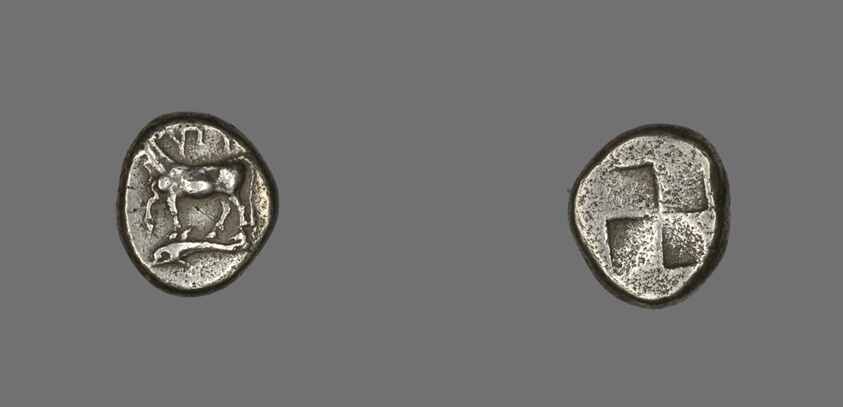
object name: Coin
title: Drachm (Coin) Depicting a Cow with Dolphin below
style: greek, ancient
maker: Greek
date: about 416-357 BCE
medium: Silver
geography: Ancient Greece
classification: coin; ancient art; struck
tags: dolphins, cows